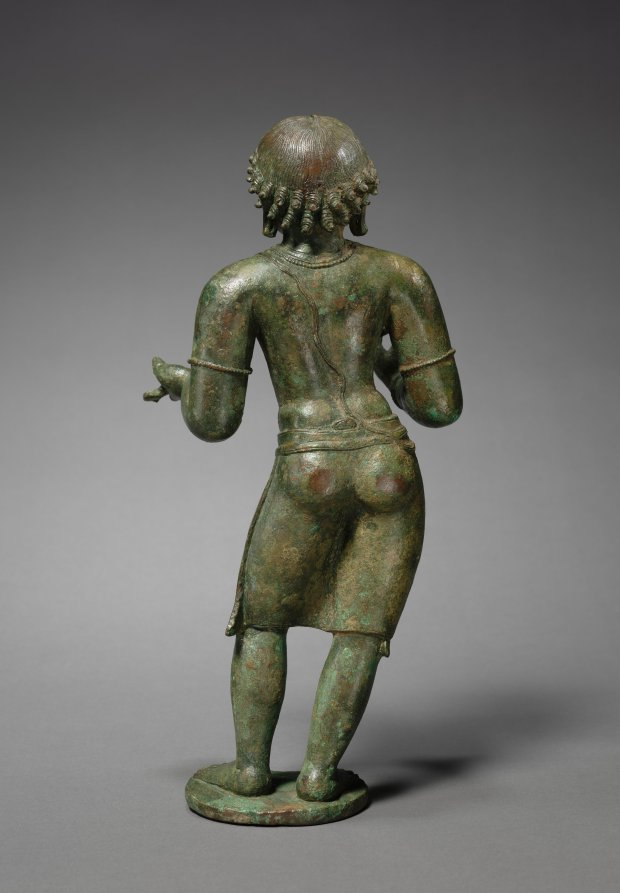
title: Shiva Saint: Manikkavachakar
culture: South India, Tamil Nadu, 12th-13th century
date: 1100s–1200s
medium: bronze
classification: Sculpture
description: During the 7th through 9th centuries in south India there was a devotional movement of saints who experienced personal mystical encounters with their god. They then composed poems and songs in their native language of Tamil that described the ecstasy and experiences of the interaction. Manikkavachakar was one of these saints; he lived during the 9th century and composed some of the most popular Tamil devotional hymns about his visions of Shiva. In his left hand he holds the pages of texts that refer to his poetry and songs.